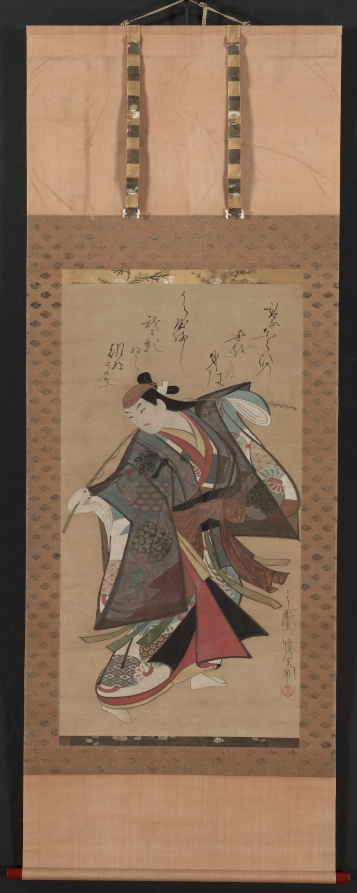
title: Sanjo Kantaro II in the Role of Urashima Taro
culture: Japan, Edo period (1615–1868)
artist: Kaigetsudō Ando (Japanese, c. 1671–1743)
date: early 1700s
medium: hanging scroll; ink and color on paper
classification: Painting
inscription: Nihon giga Kaigetsudō Ando kore [o] zu [su]. 【印】 安度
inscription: 31-syllable waka poem inscribed on the upper portion of the painting.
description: Sanjo Kantaro II was a Kabuki actor who specialized in playing youths (wakashu) and female roles (onnagata). He is shown here in the role of Urashima Taro. He rescues a tortoise, and as a reward, the tortoise carries him to the undersea palace of the Dragon King. He believes he has spent but three days there with the Dragon King's daughter; however, when he returns to the shore, he finds 300 years have passed. The actor holds a fishing pole, indicating his occupation as a fisherman. The upper portion of the painting contains a 31-syllable waka poem.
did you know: The hexagonal design on the actor's robe represents the patterning of a tortoise’s carapace.